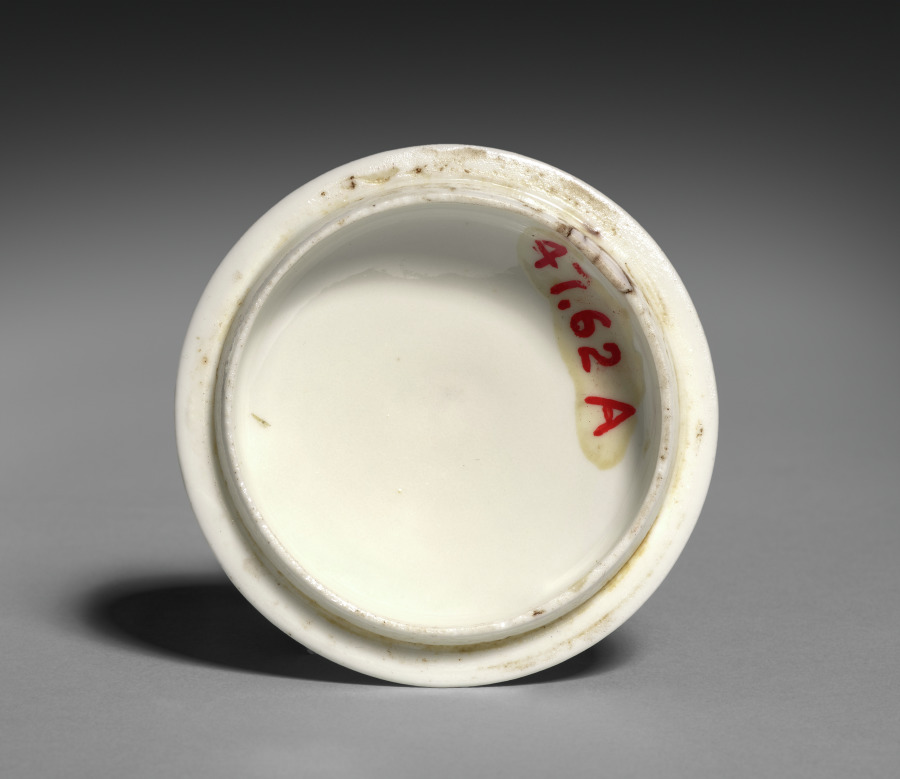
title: Figure of a Chinese with Jar (cover)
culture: France, Chantilly, 18th century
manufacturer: Chantilly Porcelain Factory (French)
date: c. 1735– 1740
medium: soft-paste porcelain with enamel decoration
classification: Ceramic